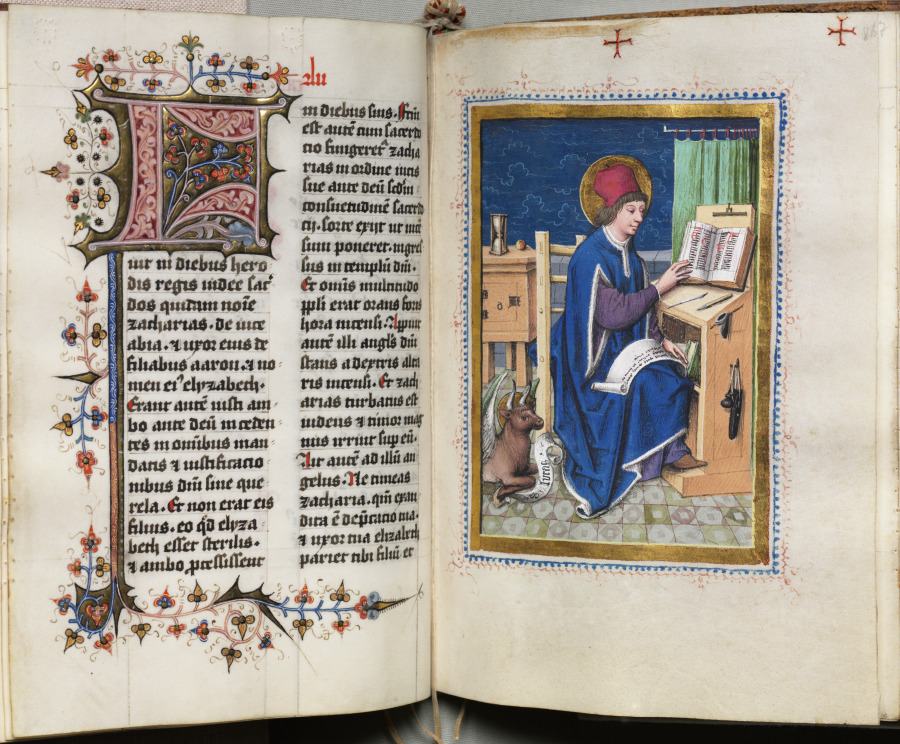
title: Gospel Book with Evangelist Portraits: Saint Luke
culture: Germany, Middle Rhine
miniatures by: Master of the House-Book (German, c. 1470–1500)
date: 1480–1500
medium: ink, tempera, and gold on vellum; original blind stamped leather binding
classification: Bound Volume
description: The four gospels are preceded by a full-page portrait miniature of the appropriate evangelist. Per tradition, they are represented as contemporary scribes surrounded by all the tools of their trade— ink pots, quill pens, and penknives. The anonymous illuminator of these miniatures, called the Hausbuch Master, is known primarily for an album of lively drawings as well as some 90 copper engravings now in Amsterdam. He was also apparently a panel painter of some distinction. The skillful pen work, tracery, and vine scrolls, as well as the large initials, are the work of other artists.The binding is original.